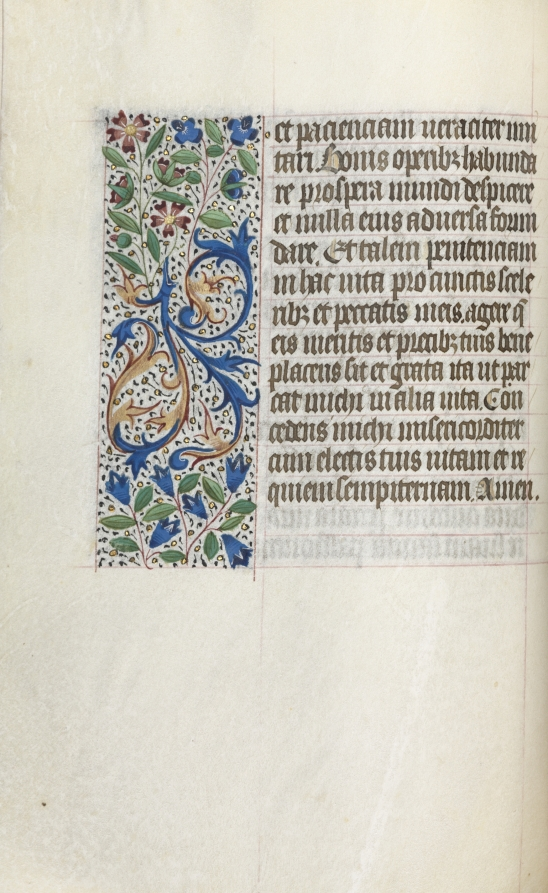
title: Book of Hours (Use of Rouen): fol. 26v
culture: France, Rouen, 15th century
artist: Master of the Geneva Latini (French, active Rouen, 1460–80)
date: c. 1470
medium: ink, tempera, and gold on vellum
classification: Bound Volume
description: In the late 1400s and early 1500s Rouen was an established and important center of book production. The city’s cathedral had a wealthy chapter that spent large sums of money to commission books and to maintain its extensive library. The stationers and booksellers would have likely been concentrated in or near the cathedral precinct. This artist, named after a manuscript now in Geneva, was Rouen’s principal illuminator during the second half of the 1400s.